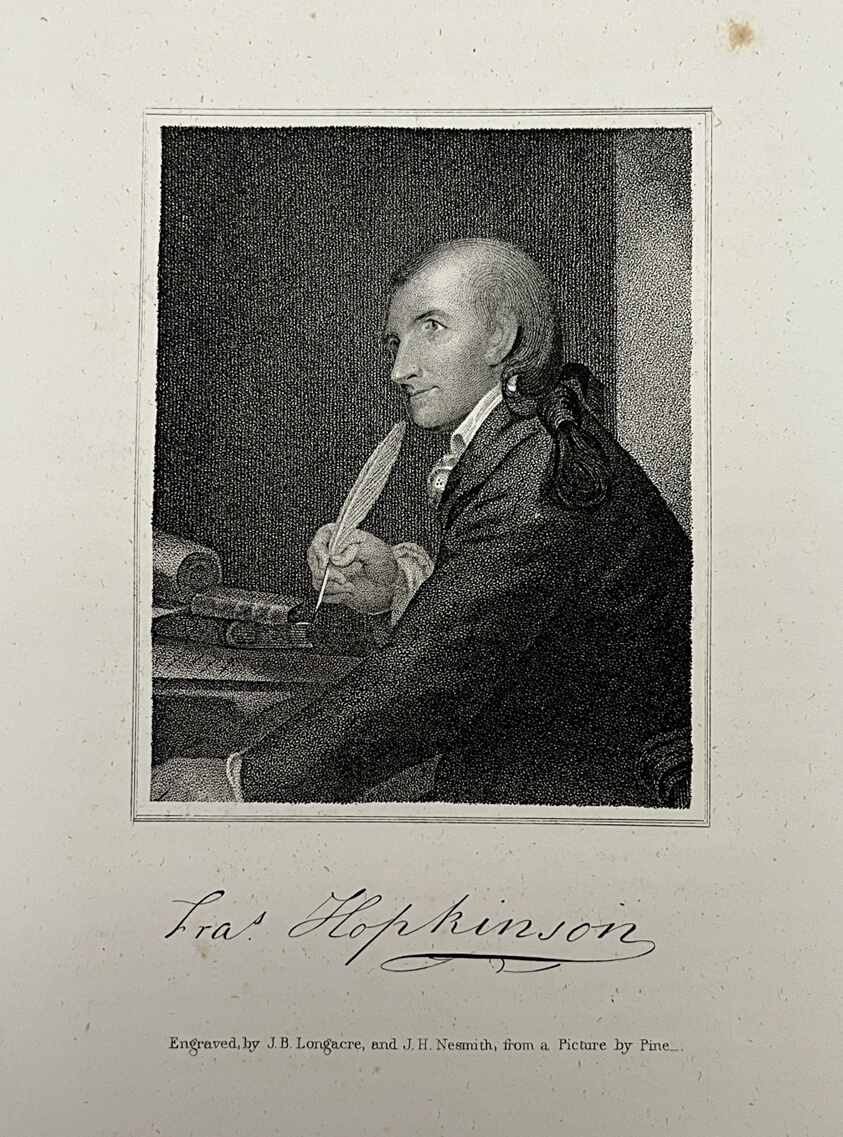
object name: Print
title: Francis Hopkinson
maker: James Barton Longacre (American, 1794-1869); and J.H. Nesmith (likely American, 19th century); after Robert Edge Pine (British, 1742-1788)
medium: Stipple engraving on paper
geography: United States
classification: reproduction; print; prints and drawing